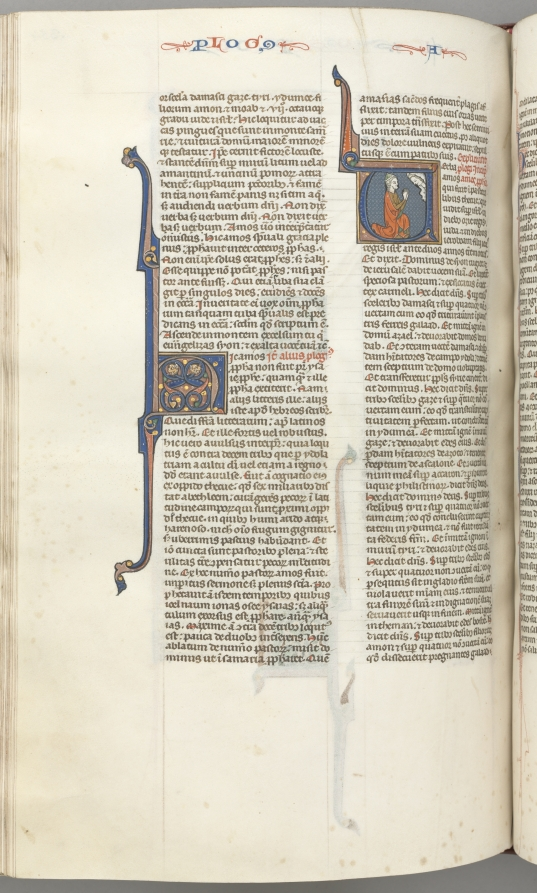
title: Fol. 354v, Amos, historiated initial V, Amos kneeling in prayer, bust of God above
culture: Southern France, Toulouse(?), 13th century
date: c. 1275–1300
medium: ink, tempera and gold on vellum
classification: Bound Volume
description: Biblical manuscripts were highly prized and important possessions of churches, monasteries, cathedral schools, and universities throughout medieval Europe. The biblical texts were known as the vulgate, the translations made by Saint Jerome in the fourth century from Hebrew and Greek into Latin, which became the definitive and official Latin version of the Roman Church. In the 13th century, the bible was, for the first time, produced as a single volume with an officially sanctioned sequence to its books and chapters as illustrated by this example. The very extensive decoration of this bible is arranged hierarchically to indicate the relative importance of the various texts so that full or almost full-page initials mark the openings of the first prologue, Genesis, and the first Gospel; historiated initials mark the beginning of each book and illuminated initials mark the Prologues.